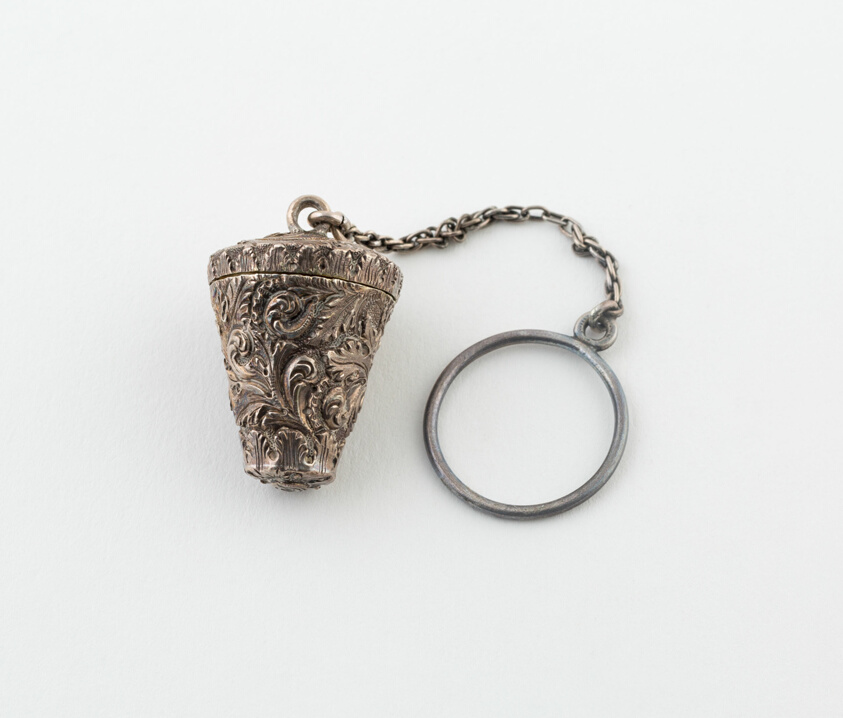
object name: Metalwork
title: Thimble-Shaped Vinaigrette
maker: Possibly England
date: c. 1840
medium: Silver and silver gilt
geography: England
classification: container for personal use; vinaigrette (container for health care); european decorative arts; metalwork; silver; decorative object/ornament